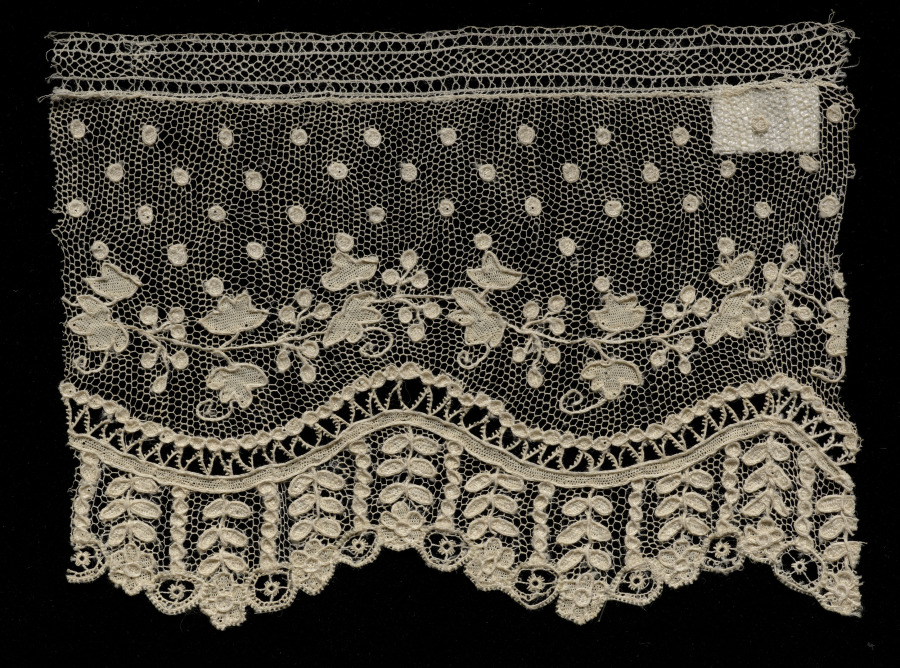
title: Lace Edging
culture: France, Alençon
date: 1900–1935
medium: Linen: needle lace (Point d'Alençon)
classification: Lace